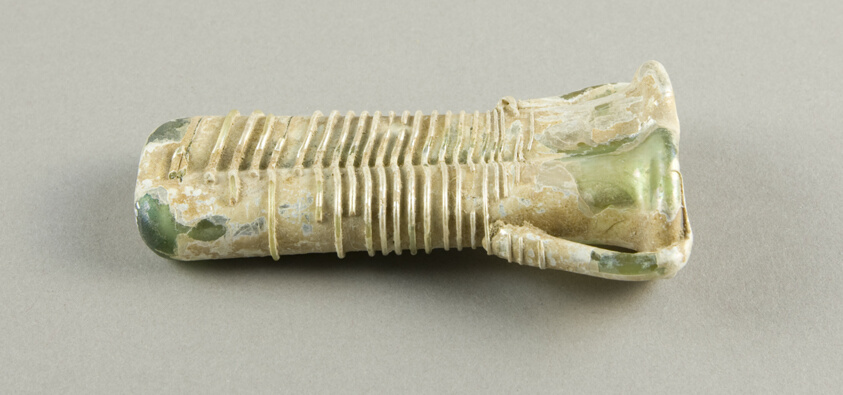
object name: Vessel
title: Cosmetic Container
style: syrian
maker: Roman; Levant or Syria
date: 4th century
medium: Glass, blown technique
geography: Syria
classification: glass; vessel; ancient art